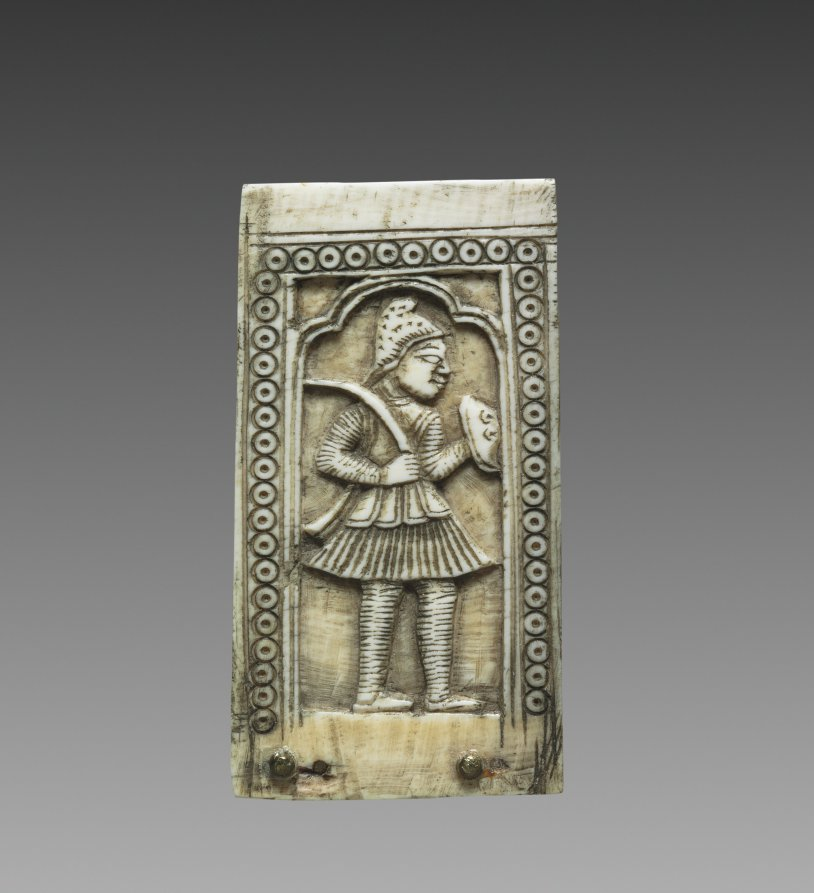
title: Panel from a Box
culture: India, North East Deccan, Visakhapatnam district, Mughal Dynasty (1526-1756)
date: c. 1700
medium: ivory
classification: Ivory